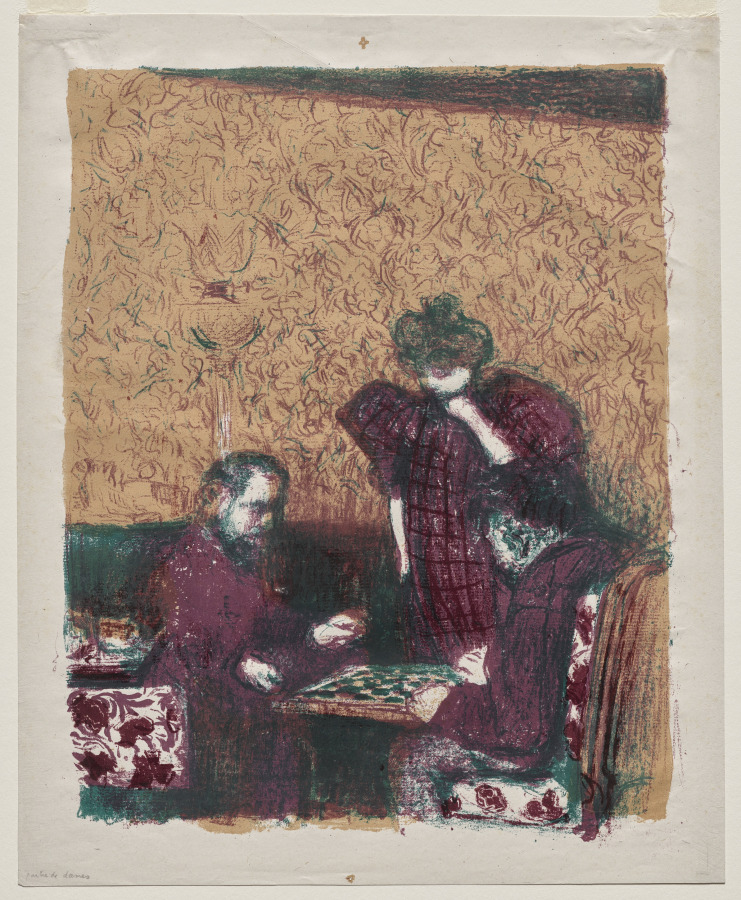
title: The Game of Checkers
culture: France, 19th century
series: Landscapes and Interiors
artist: Édouard Vuillard (French, 1868–1940)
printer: Auguste Clot (French, 1858–1936)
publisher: Ambroise Vollard (French, 1867–1939)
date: 1899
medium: color lithograph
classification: Print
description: Ambroise Vollard (1865–1939), a dealer in Impressionist paintings, was also an important print publisher. In 1895 he commissioned his first portfolio from Pierre Bonnard: 12 color lithographs called Some Aspects of Paris Life (one of them is shown nearby). This was followed by many other albums of prints, including Vuillard's Landscapes and Interiors. Bonnard and Vuillard were members of a group of artists called the Nabis—the Hebrew word for "prophet"—which evokes both their playful mysticism and their determination to develop a new artistic language based on the notion that form and color could be used expressively. The Nabis favored subjects of the modern city and middle-class family life depicted in a decorative and even whimsical manner. Vuillard's intimate scenes of comfortable domesticity are wonderful examples of the beautiful color lithography produced in the 1890s.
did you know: Checkers is derived from the ancient Middle Eastern game of Qirkat.